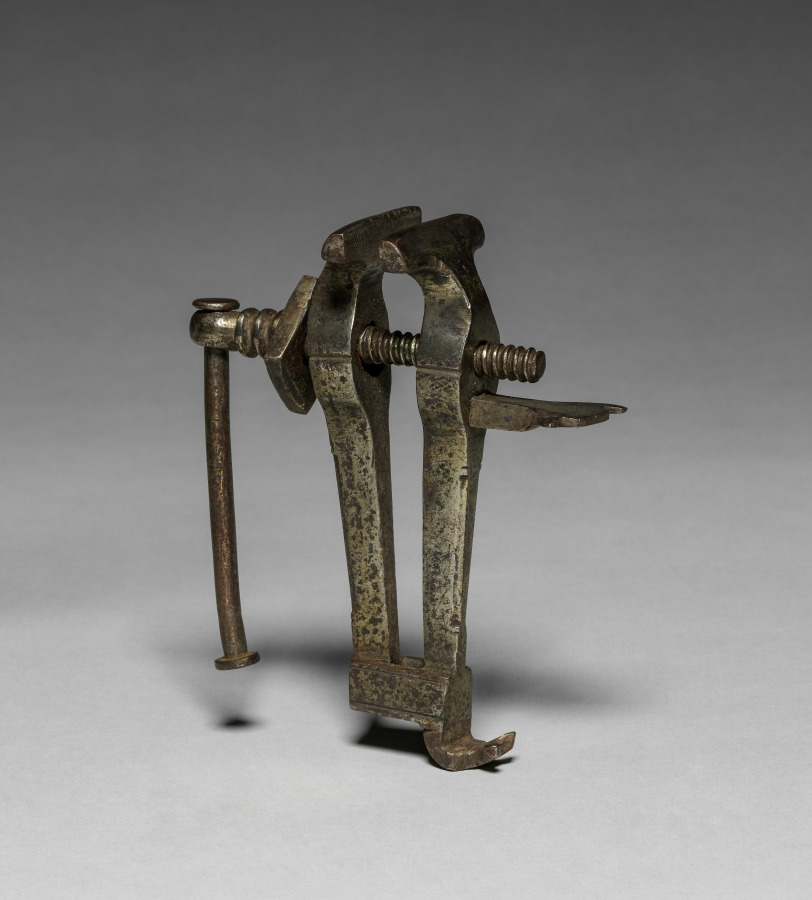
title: Hand Vice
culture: Europe, 17th-18th century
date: 1600s–1700s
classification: Tool